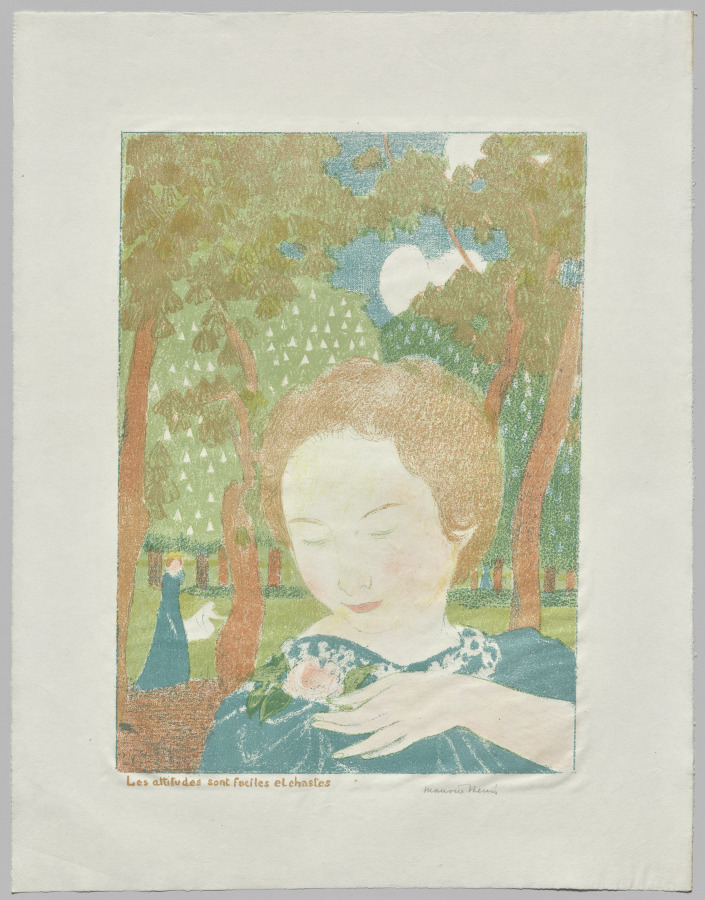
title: Attitudes are Easy and Chaste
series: Love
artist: Maurice Denis (French, 1870–1943)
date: 1899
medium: color lithograph on wove paper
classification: Print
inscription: Recto, lower left: “Les attitudes sont faciles et chastes”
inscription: In graphite, recto, lower right: “Maurice Denis (signed)”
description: Maurice Denis belonged to the Nabis, a group of artists who came together in 1889 to pursue a radical new style informed by subjective experience and emotion. This print is from a series in which Denis explored his devotion to his wife, Marthe, by depicting her in a variety of settings alongside titles drawn from his own journal. The vague but evocative images were meant to encourage the viewer to draw connections to the theme and meditate on its meaning.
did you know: Maurice Denis was a devout Catholic and often drew visual connections between his wife, Marthe, the subject of this print series, and the Virgin Mary.